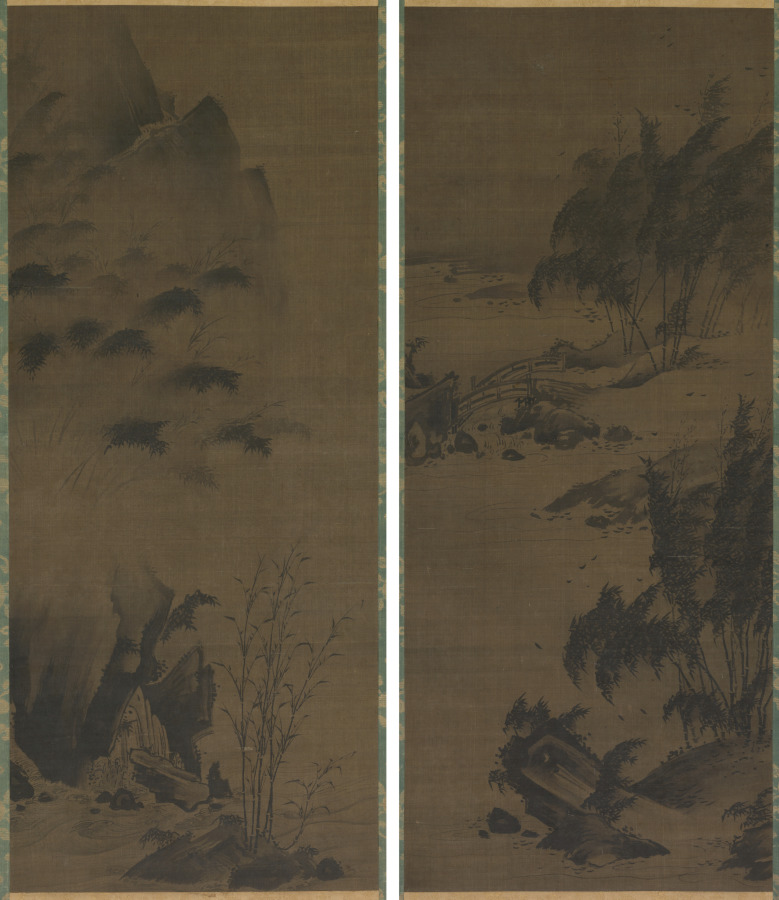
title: Bamboo in Rain; Bamboo in Wind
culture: Japan, Muromachi period (1392–1573)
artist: Genga (Japanese)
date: early 1500s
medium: hanging scroll; ink on silk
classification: Painting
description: East Asian paintings from China, Korea, and Japan were frequently conceived as sets of multiple images. These sets might have been composed for specific palace or temple rooms, or to portray a specific theme, such as the four seasons. Over time, the original intent of such sets is often lost through damage, changes in ownership, or a variety of other reasons. The identity of the artist can also be lost, but then, sometimes, retrieved. This pair of ink paintings has traditionally been labeled as Japanese and attributed to the 16th-century painter Genga. Since there are no seals or signature of the artist on the painting, this attribution was based on comparisons of brush style with paintings known to be by Genga. More recent study indicates that while the 16th century is an appropriate time frame for the pair, the precise cultural identity of the artist is not certain after all. The dark, eccentric shapes of the rocks and bamboo clusters and the dramatic tonal contrasts evident throughout the composition point to either Korean authorship or influence upon a Japanese painter of the period.